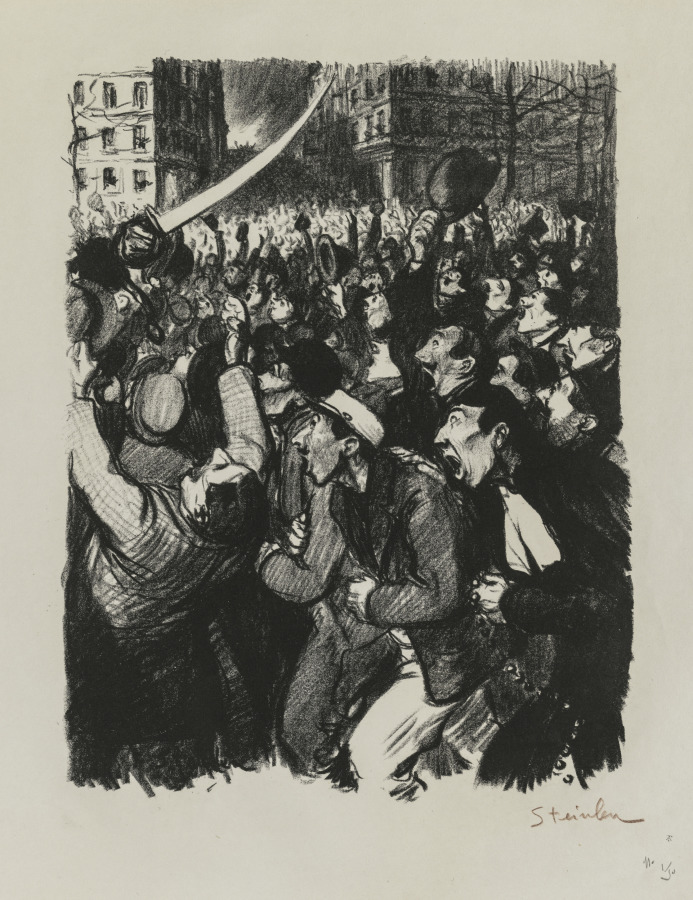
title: Les Moutons de Boisdeffre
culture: Switzerland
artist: Théophile Alexandre Steinlen (Swiss, 1859–1923)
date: 1898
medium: lithograph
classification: Print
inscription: Upper right margin, in graphite: c. 206\; lower right, in brown pencil: Steinlen